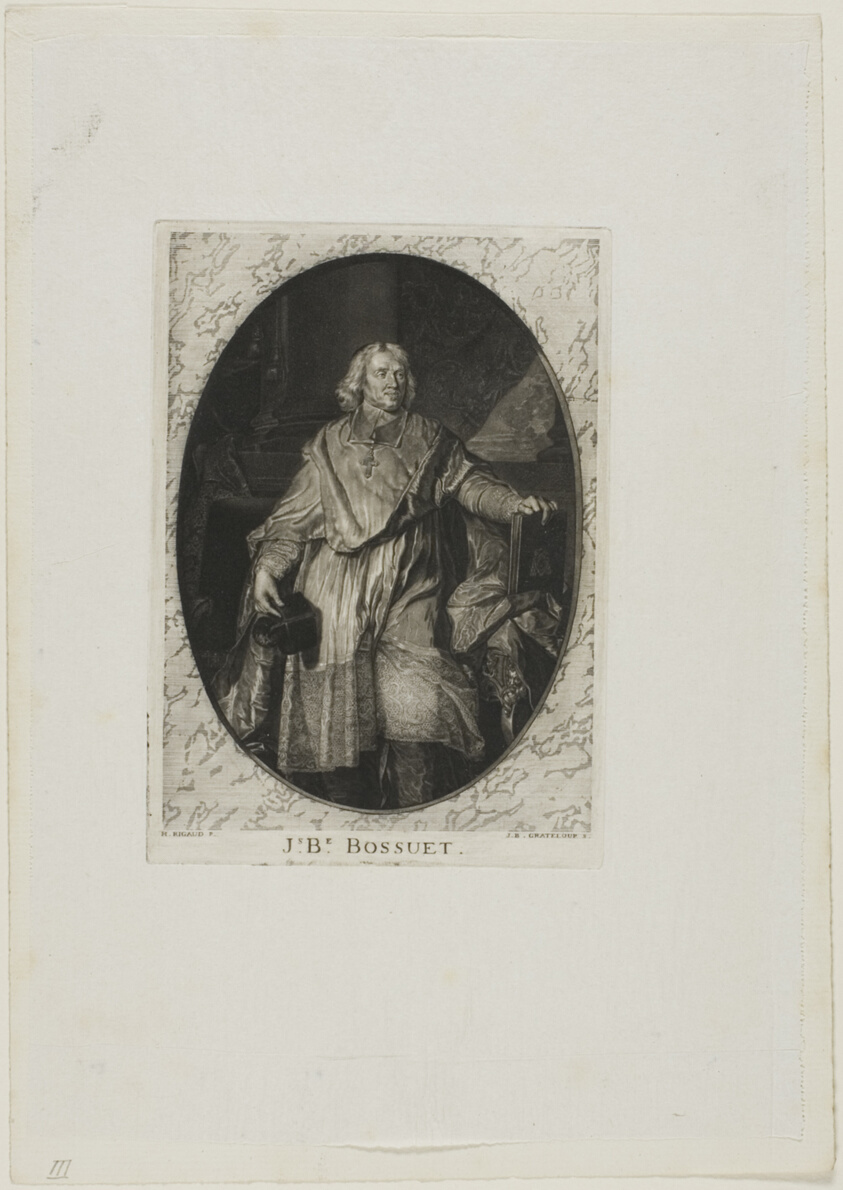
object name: Print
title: J-B. Bosseut: Standing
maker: Jean-Baptiste de Grateloup (French, 1735-1817)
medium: Aquatint on paper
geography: France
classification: aquatint; print; prints and drawing